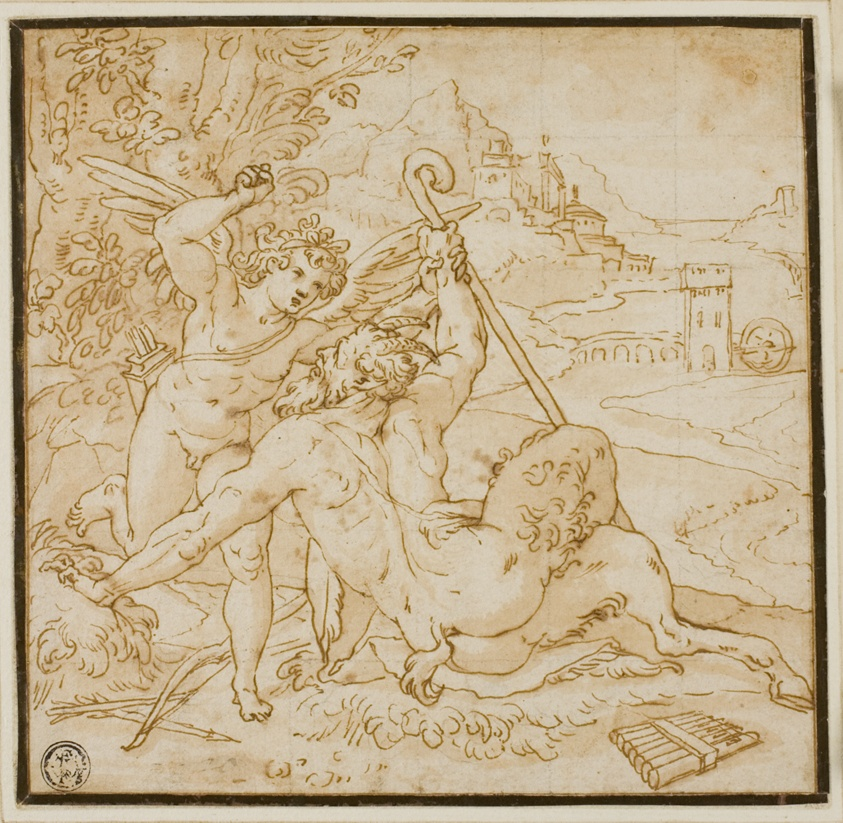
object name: Drawing and Watercolor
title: Cupid Overcoming Pan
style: medieval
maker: Orazio Samacchini (Italian, 1532-1577)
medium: Pen and brown ink, with brush and brown wash, squared in black chalk, on ivory laid paper, laid down on ivory laid card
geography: Italy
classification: pen and ink drawings; manuscript; drawings (visual works); prints and drawing